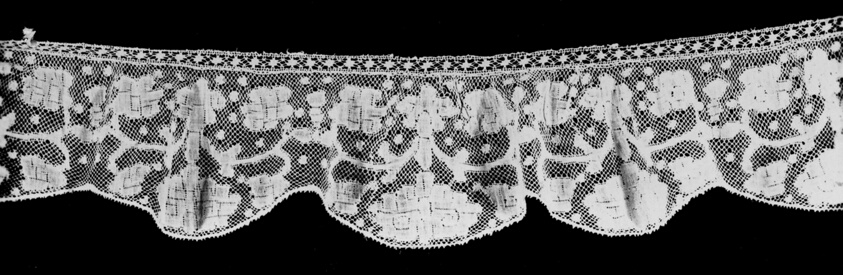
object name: Textile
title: Border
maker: Belgium, Flanders, probably Antwerp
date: 1825/50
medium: Cotton, bobbin straight lace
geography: Flanders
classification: textile; lace - bobbin